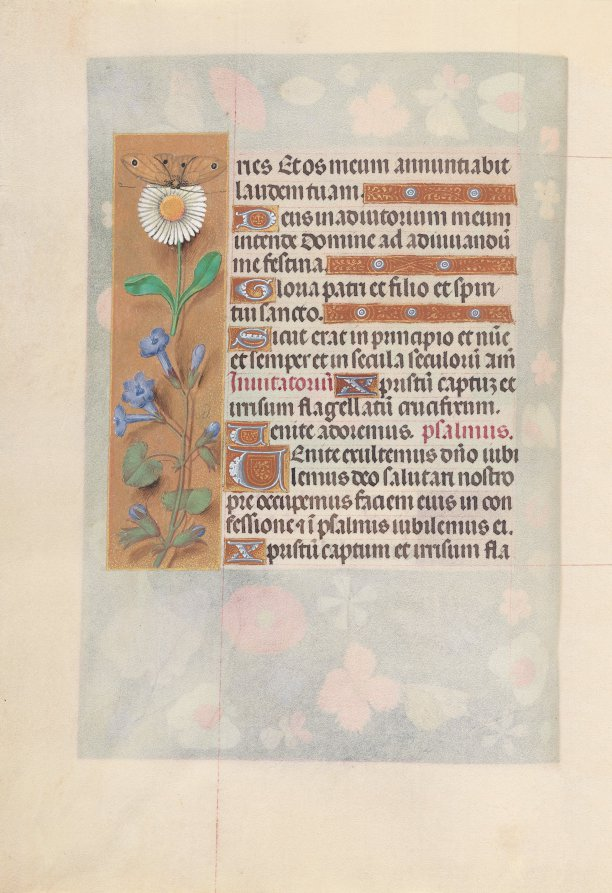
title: Hours of Queen Isabella the Catholic, Queen of Spain: Fol. 50v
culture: Flanders, Ghent and Bruges, late 15th century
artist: Master of the First Prayerbook of Maximillian (Flemish, c. 1444–1519)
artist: and Associates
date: c. 1500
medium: ink, tempera, and gold on vellum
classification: Bound Volume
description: This manuscript was illuminated by a circle of at least five highly organized manuscript painters active in the Flemish cities of Ghent and Bruges. The principal illuminator was Alexander Bening, who painted the majority of the book's miniatures. Manuscripts produced by this circle of artists are renowned for the decoration of their borders, which typically feature a rich variety of realistically-painted flowers, birds, and butterflies. This prayer book, called a book of hours, was intended not for a cleric, but for the private devotions of a lay person-in this case, Isabella the Catholic, Queen of Spain (1451-1504). Isabella's coat of arms embellishes the book's frontispiece. It is unlikely that the book was commissioned by the Queen herself; rather, she probably received it as a diplomatic gift from someone courting her patronage, perhaps Cardinal Francisco Jimenez de Cisneros. A Franciscan friar, Jimenez was dependent upon Isabella for his advancement, first to the post of Queen's confessor in 1492, and then to Archbishop of Toledo in 1495.